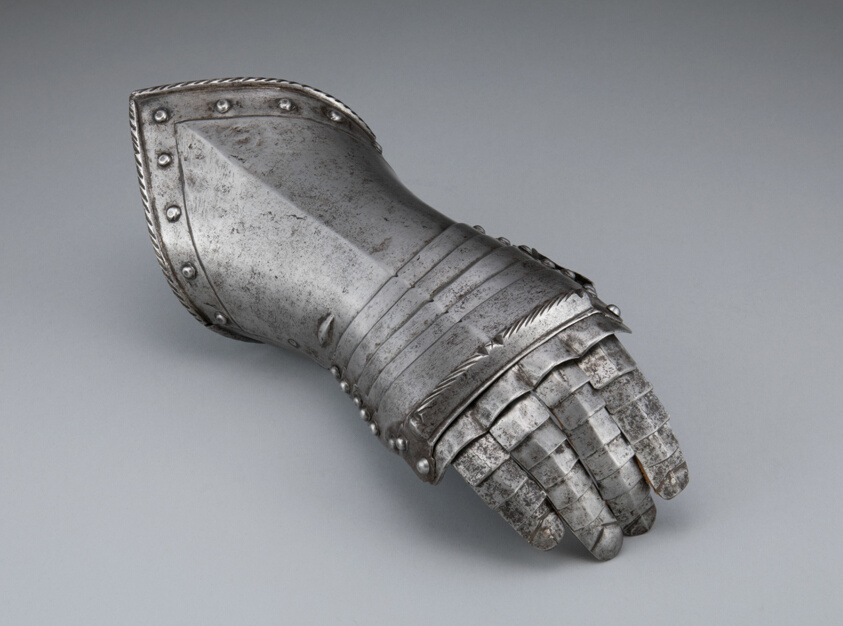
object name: Armor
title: Fingered Gauntlet for the Right Hand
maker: Southern German, Nuremberg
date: c. 1580/1600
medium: Steel and leather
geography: Nuremberg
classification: suit-gauntlet; armor; arms and armor